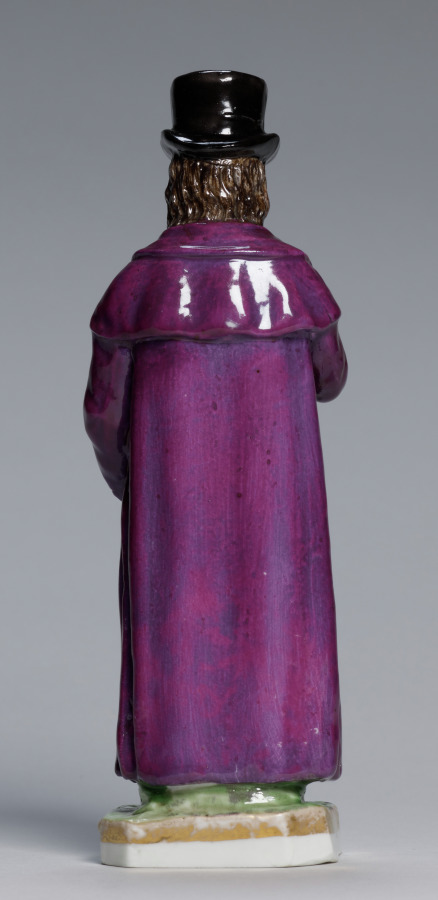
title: Man Holding a Watch (The Buyer)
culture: Russia, Moscow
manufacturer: Gardner Factory (Russian)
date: c. 1820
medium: porcelain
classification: Ceramic